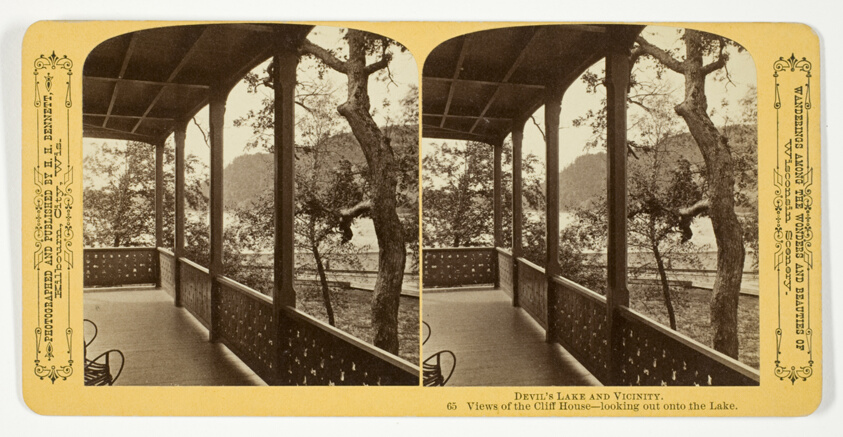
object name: Photograph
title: Views of the Cliff House - looking out onto the Lake, No. 65 from the series "Devil's Lake and Vicinity"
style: 19th century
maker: Henry Hamilton Bennett (American, born Canada, 1843-1908)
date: 1870/1908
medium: Albumen print, stereo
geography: Wisconsin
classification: photography; photograph; albumen silver print; stereograph (albumen)